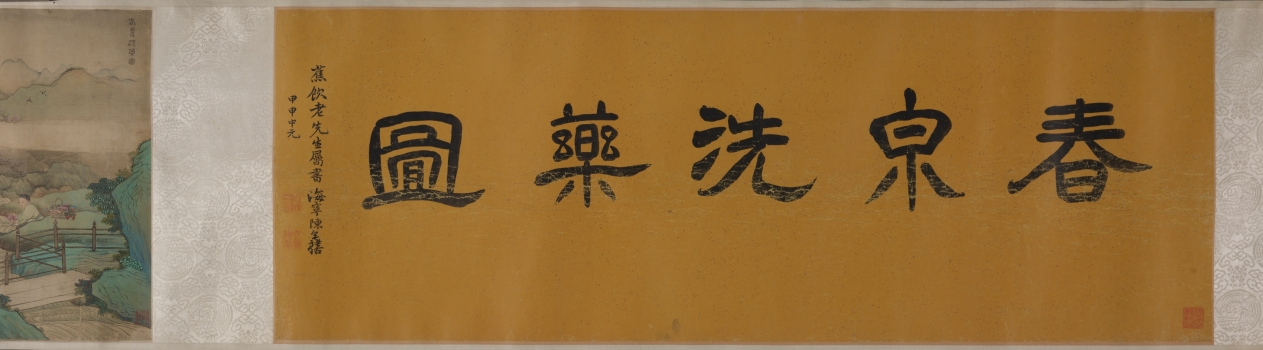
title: Cleansing Medicinal Herbs in the Stream on a Spring Day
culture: China, Qing dynasty (1644-1911)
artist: Yu Zhiding (Chinese, 1647–c. 1716)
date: 1703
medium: Handscroll; ink and color on silk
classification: Painting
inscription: Title by Chen Yixi.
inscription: 姑射仙人冰雪膚，新詩傳唱滿通都。/ 極知遲暮難為別，更展春泉洗藥圖。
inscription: Colophon by Chen Tingjing 陳廷敬 (1639–1712). Colophon by Wang Hongxu 王鴻緒 (1645–1723), dated 1707. Colophon by Song Luo 宋犖 (1634–1714). Colophon by Liu Yan 劉巗. Colophon by Jing Xikui 涇西夔. Colophon by Liu Yan 劉巗. Colophon by Cao Yin 曹寅. Colophon by Wang Shihong 汪士鋐. Colophon by Wang Shidan 王式丹 (1645–1718), dated 1712. Colophon by Shi Shenyi 史申義 (1661–1712), dated 1712. Colophon by Yin Yuqing 殷餘慶, dated 1712.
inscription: Colophon by Chen Shixia 陳時夏, dated 1729.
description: A famous portraitist, Yu Zhiding here depicts the likeness of Shi Shenyi 史申義 (1661–1712), an official and poet. Master Shi, a sickly man, was deeply interested in medicinal science. The opening section of the scroll features a boy washing a fungus in fresh spring water, a basket of medicinal herbs by his side. Other servants carry a fan, a bundle of scrolls, and a cup of tea or hot wine. Master Shi sits in a bamboo grove, surrounded by fields of herbs. Returning swallows, pink peach blossoms, and blooming magnolia indicate spring, whereas the fungus conveys wishes for long life. The spring theme may express the artist’s wish for his friend’s recovery.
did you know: In the pavilion are some of Shi Shenyi’s scholarly accoutrements: a stack of books, an antique zun 尊 (wine vessel), a brush holder, an ink stone, and a small chime.